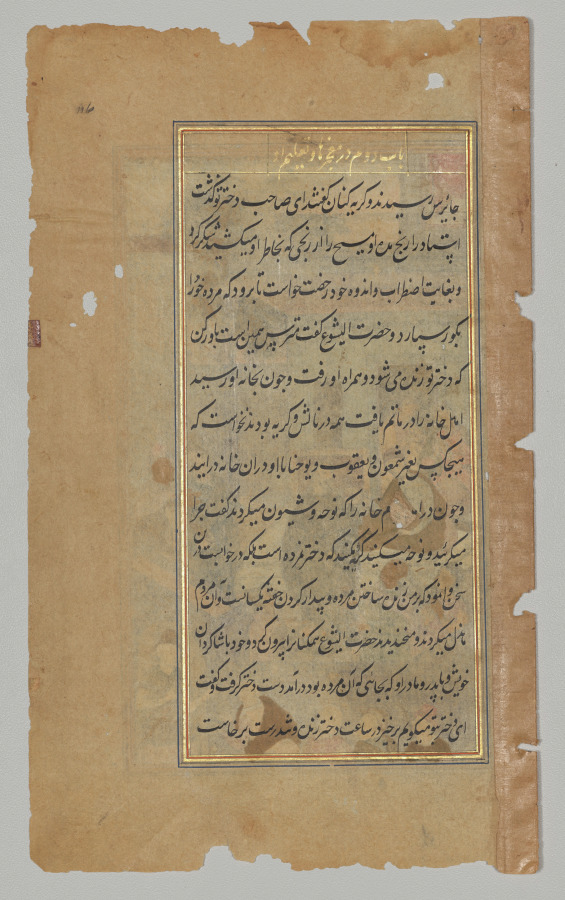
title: Text page from a Mirror of Holiness (Mir’at al-quds) of Father Jerome Xavier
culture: Mughal India, Allahabad, made for Prince Salim (1569–1627)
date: 1602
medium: Ink and gold on paper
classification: Manuscript